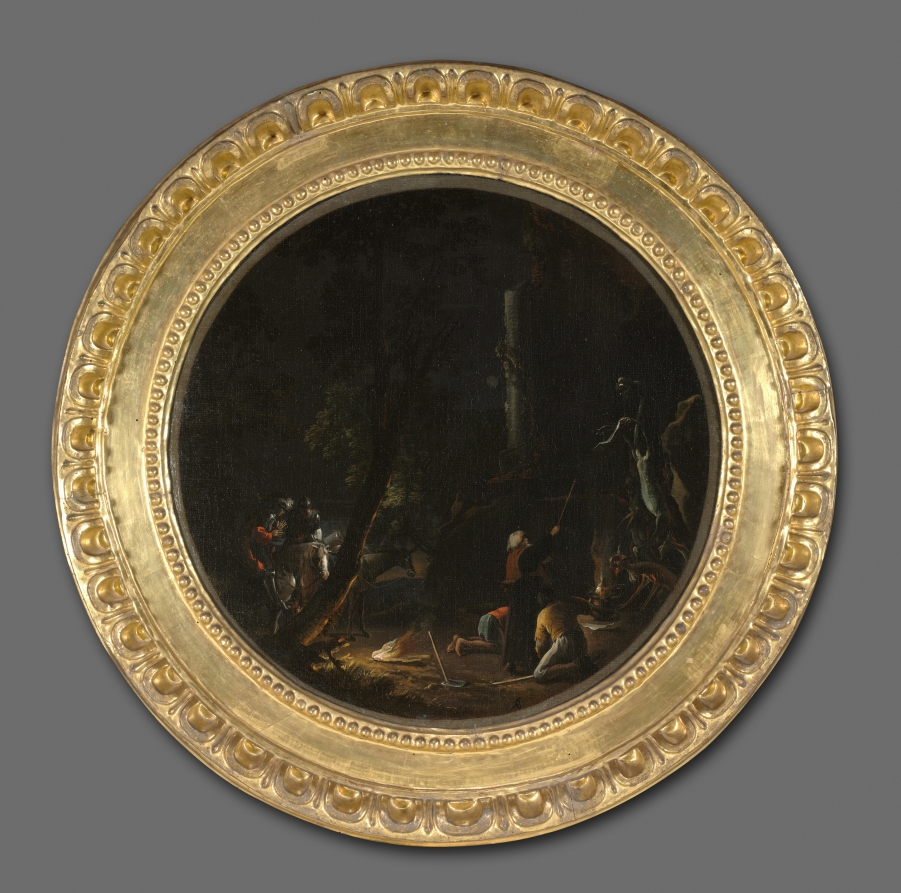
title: Scenes of Witchcraft: Night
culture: Italy, 17th century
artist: Salvator Rosa (Italian, 1615–1673)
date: c. 1645–1649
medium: oil on canvas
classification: Painting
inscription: Signed: "SR [monogram]"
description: In the pitch black of night, two groups of men are gathered in a forest. To the left, travelers apprehensively pause to watch a magician conjure terrifying apparitions. Since the Middle Ages, necromancy, the act of communing with the dead, was associated with male sorcerers. In Rosa's painting, the wizened necromancer who stands tall and resolute directly below a classical column is reminiscent of Moses, a predecessor to Renaissance depictions of sorcerers. Rosa's learned magicians not only invoke associations with philosophers and intellects, but they would have also referred to the artist himself and the intellectual elite with whom he associated in Florence. Just as a powerful magician could conjure strange creatures with his wand, so too could Rosa shape a strange world with his originality, intelligence, and the skillful use of paint and brush.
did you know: The artist chose the painting's shape to reference the foundational role of the circle in practicing magic.